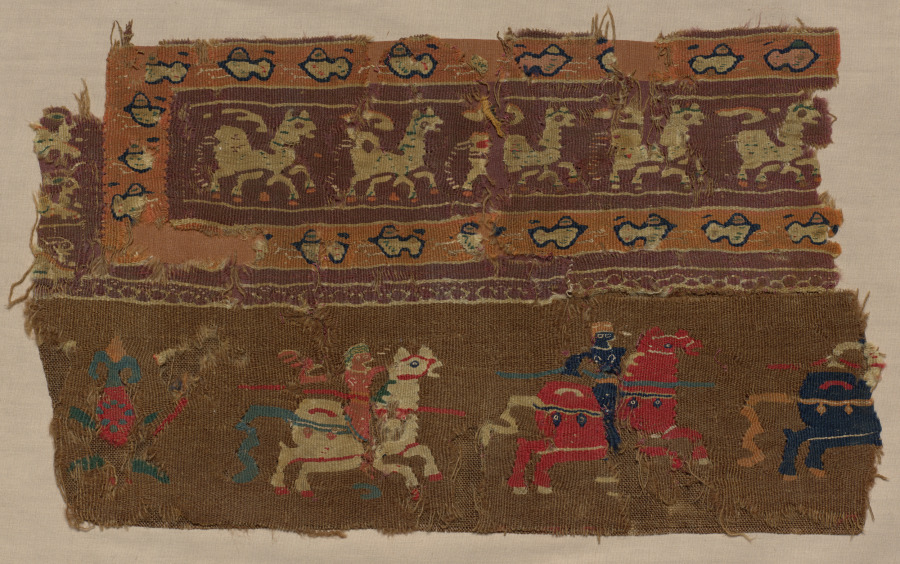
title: Fragment of a Tunic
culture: Egypt, Byzantine period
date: 400s–600s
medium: Wool and linen: tapestry weave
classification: Textile